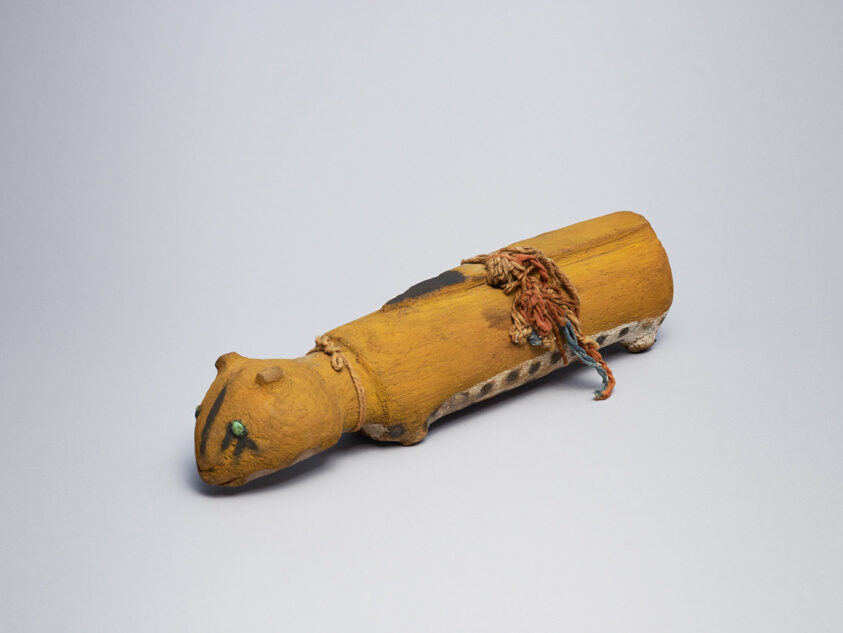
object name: Religious/Ritual Object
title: Ritual Cache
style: salado, mimbres, mogollon, americas, southwest, native american, native north american, Arts of the Americas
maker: Salado branch of the Mogollon; New Mexico, United States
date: 1300–1400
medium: Wood, stone, plant fibers, cotton, feathers, hide, and pigment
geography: New Mexico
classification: ceremonial object; ceramics; masks; ritual objects; art of the americas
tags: ceremonial objects, figures (representations), snakes, ritual objects, mountain lions, indigenous, nature, altar, offering, feathers, corn, lightning, fertility, supernatural, basketry, hunting